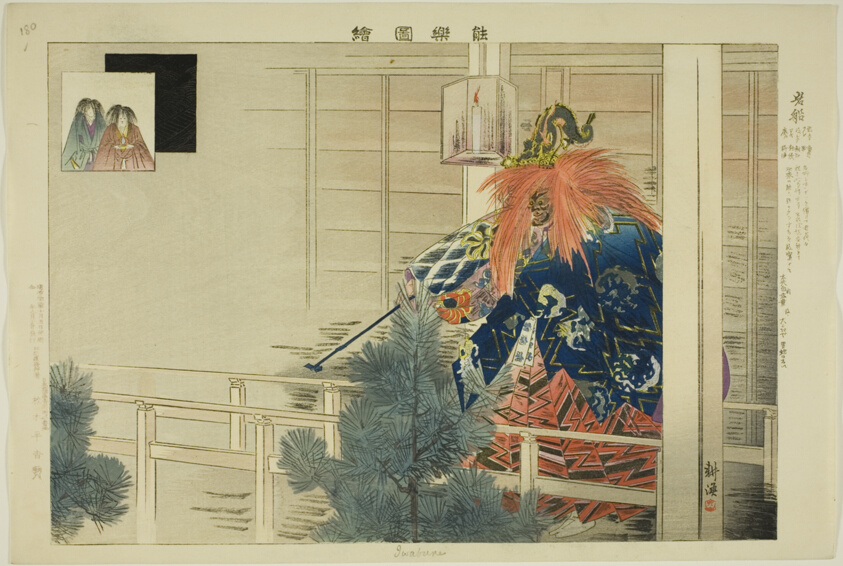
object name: Print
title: Iwafune, from the series "Pictures of No Performances (Nogaku Zue)"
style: Japanese (culture or style)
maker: Tsukioka Kogyo; Japanese, 1869-1927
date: 1898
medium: Color woodblock print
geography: Japan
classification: woodblock print; print; asian art